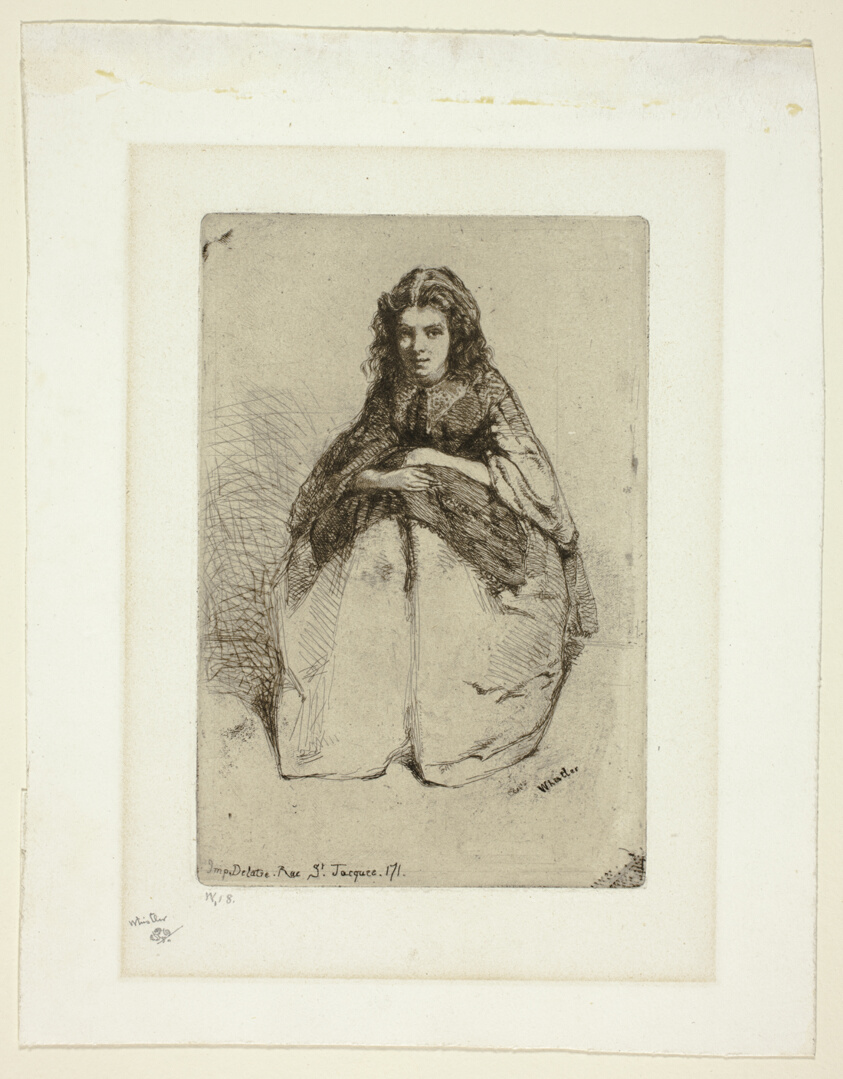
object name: Print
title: Fumette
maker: James McNeill Whistler (American, 1834-1903)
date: 1858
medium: Etching with foul biting in dark brown ink on off-white China paper laid down on off-white wove paper (chine collé)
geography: United States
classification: etching; foul biting; print; prints and drawing; paper